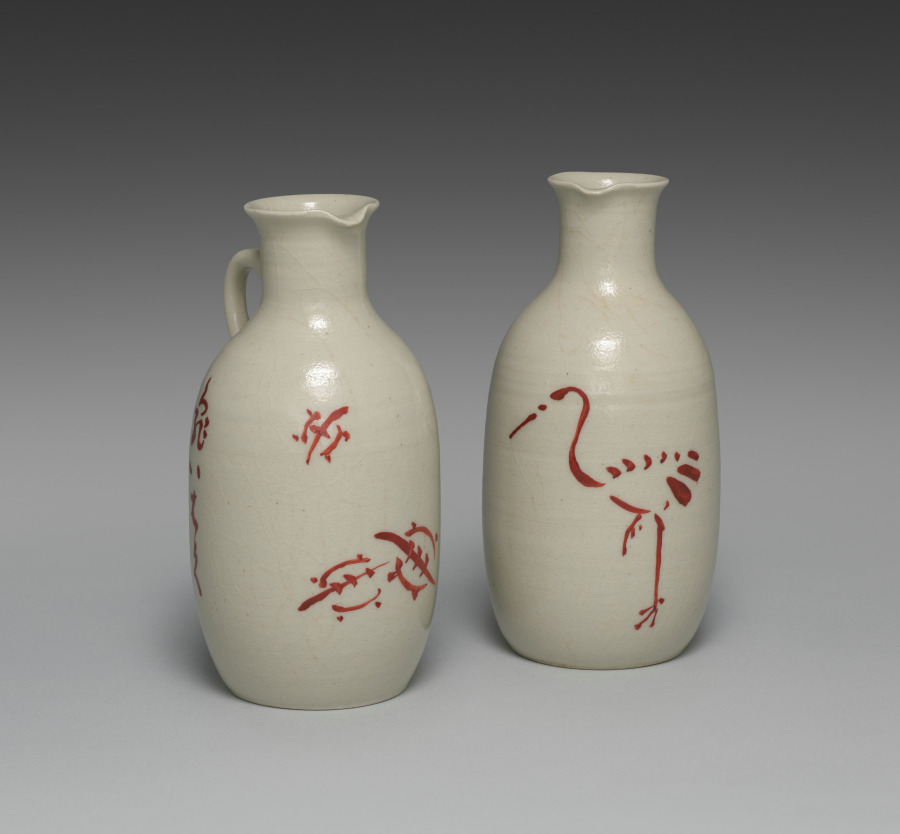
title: Sake Pourers with Crane and Tortoises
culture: Japan, Meiji period (1868–1912)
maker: Seifū Yohei III (Japanese, 1851–1914)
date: 1893–1914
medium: Pair of sake flasks; porcelain with overglaze color enamel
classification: Ceramic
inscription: 爭食羣雞前，同遊者同志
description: One flask of this pair has stencil-like paintings of three turtles—a young one with its parents—while the other has a crane with a leg raised. Cranes and turtles are well-recognized symbols of longevity in East Asia, with the turtle said to live for ten thousand years and the crane for one thousand. Each flask also has a poem on the back, one in Chinese and the other in Japanese. The latter, which appears on the turtle flask, reads kame iwaku kamiyo wa, ore no wakaki toki. The seventeen-syllable poem begins with “turtle” and ends with “when I was young.” It can be translated as, “the turtle said the world of the gods began when I was young.” The poem on the crane flask is two nonconsecutive five-character lines from a poem called “Crane Feelings” by the famous Tang dynasty poet Bai Juyi (772–846). One character in one of the lines has been altered. This creative poetic sampling results in a verse reading zheng shi qun ji qian, tong you zhe tong zhi 爭食羣雞前，同遊者同志. It could perhaps be translated, “before the flock of chickens competing for food, those traveling together have the same ambitions.”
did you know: This pair of seemingly humble sake pourers celebrate longevity and delight in a literary tradition that embraces multiple forms of poetic expression.